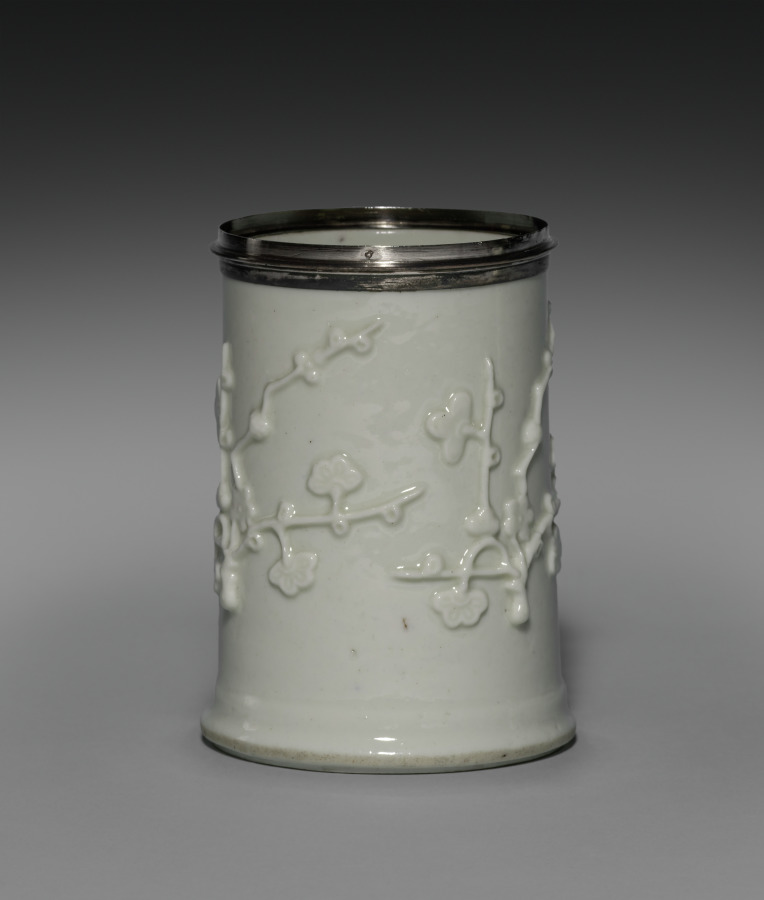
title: Sugar Caster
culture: France, Saint Cloud, 18th century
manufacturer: Saint Cloud Porcelain Factory (French)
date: c. 1732– 1738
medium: soft-paste porcelain, silver mount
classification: Ceramic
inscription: [Discharge mark of Hubert Louvet, 1732-1738 (Dog's head in profile), on both sections of silver mount]